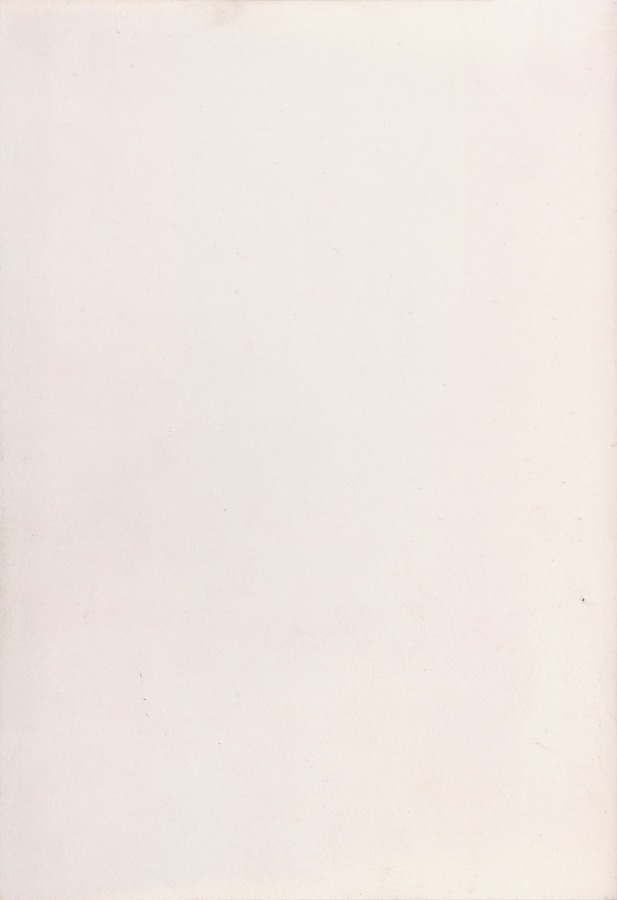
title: Hours of Queen Isabella the Catholic, Queen of Spain: Fol. 1r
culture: Flanders, Ghent and Bruges, late 15th century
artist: Master of the First Prayerbook of Maximillian (Flemish, c. 1444–1519)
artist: and Associates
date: c. 1500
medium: ink, tempera, and gold on vellum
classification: Bound Volume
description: This manuscript was illuminated by a circle of at least five highly organized manuscript painters active in the Flemish cities of Ghent and Bruges. The principal illuminator was Alexander Bening, who painted the majority of the book's miniatures. Manuscripts produced by this circle of artists are renowned for the decoration of their borders, which typically feature a rich variety of realistically painted flowers, birds, and butterflies. This prayer book, called a book of hours, was intended not for a cleric but for the private devotions of a lay person—in this case, Isabella the Catholic, Queen of Spain (1451–1504); her coat of arms embellishes the book's frontispiece. It is unlikely that the book was commissioned by the Queen herself; rather, she probably received it as a diplomatic gift from someone courting her patronage, perhaps Cardinal Francisco Jimenez de Cisneros. A Franciscan friar, Jimenez was dependent upon Isabella for his advancement, first to the post of Queen's confessor in 1492, and then to Archbishop of Toledo in 1495.